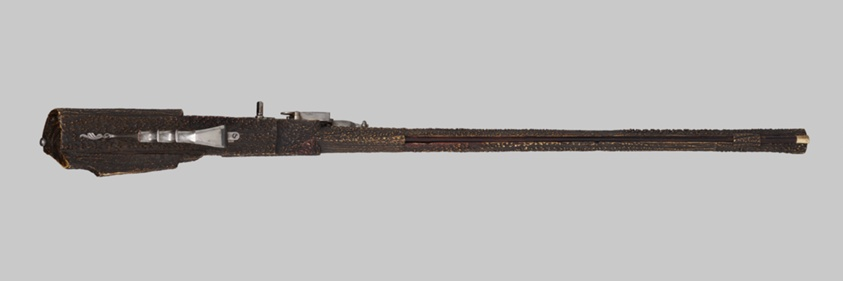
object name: Arms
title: Wheellock Rifle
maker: Elias Becker (German, Augsburg active 1633-1673); Augsburg, Germany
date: c. 1670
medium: Steel, staghorn, cherry wood, beech wood, gilt brass, copper, and enamel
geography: Augsburg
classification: firearm-long gun; arms; decorative arts; european decorative arts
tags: arms